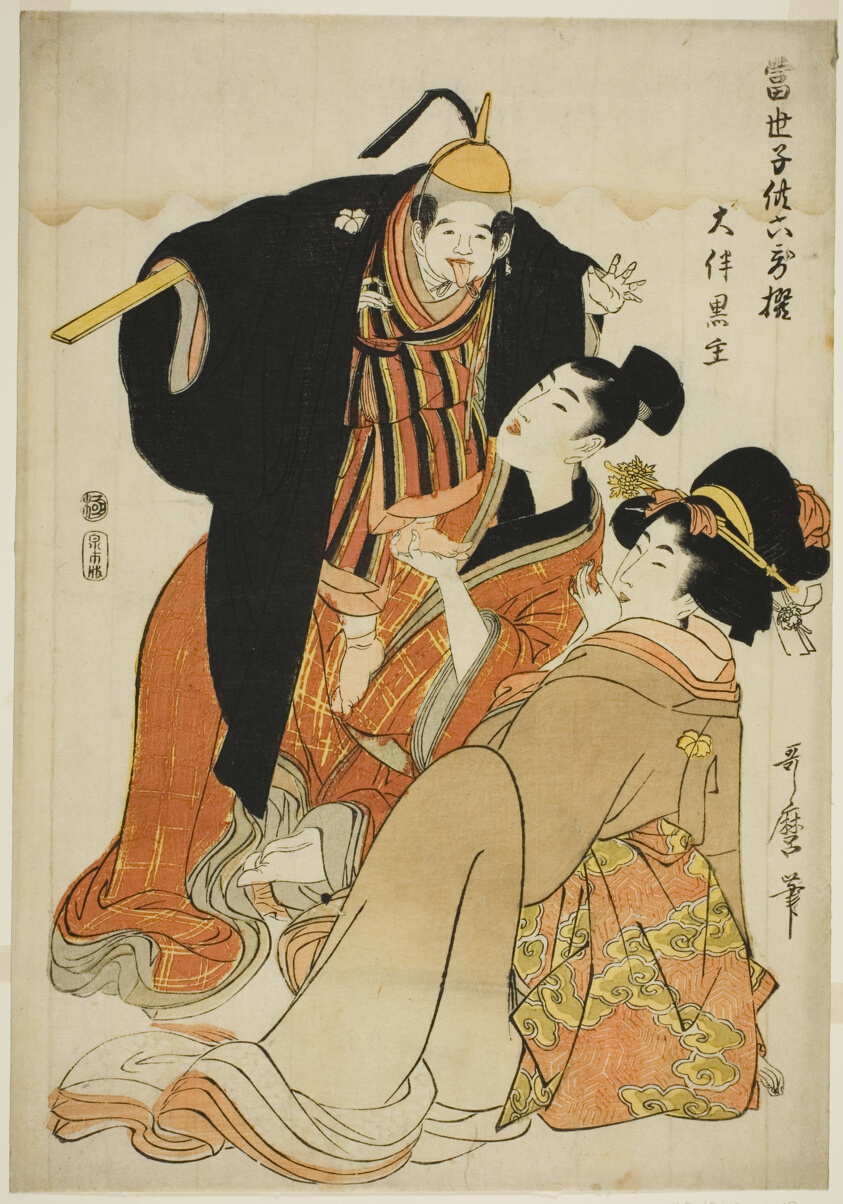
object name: Print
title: The Poet Otomo no Kuronushi, from the series "Modern Children as the Six Immortal Poets (Tosei kodomo rokkasen)"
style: Japanese (culture or style)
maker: Kitagawa Utamaro 喜多川 歌麿; Japanese, 1753 (?)-1806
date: c. 1804/05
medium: Color woodblock print; oban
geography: Japan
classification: woodblock print; print; asian art